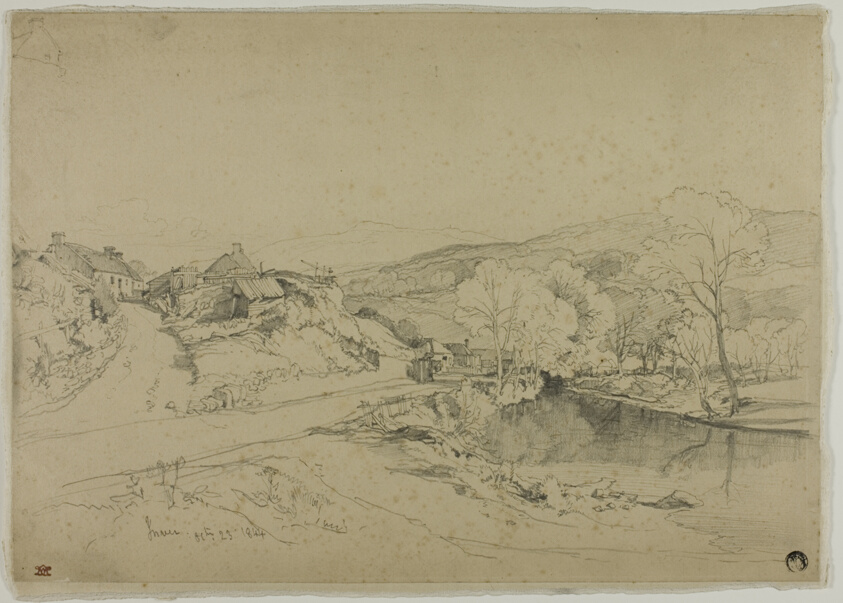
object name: Drawing and Watercolor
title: Inverness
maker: William Leighton Leitch (Scottish, 1804-1883)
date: 1844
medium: Graphite, on tan wove paper, laid down on cream board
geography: Scotland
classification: graphite; drawings (visual works); prints and drawing